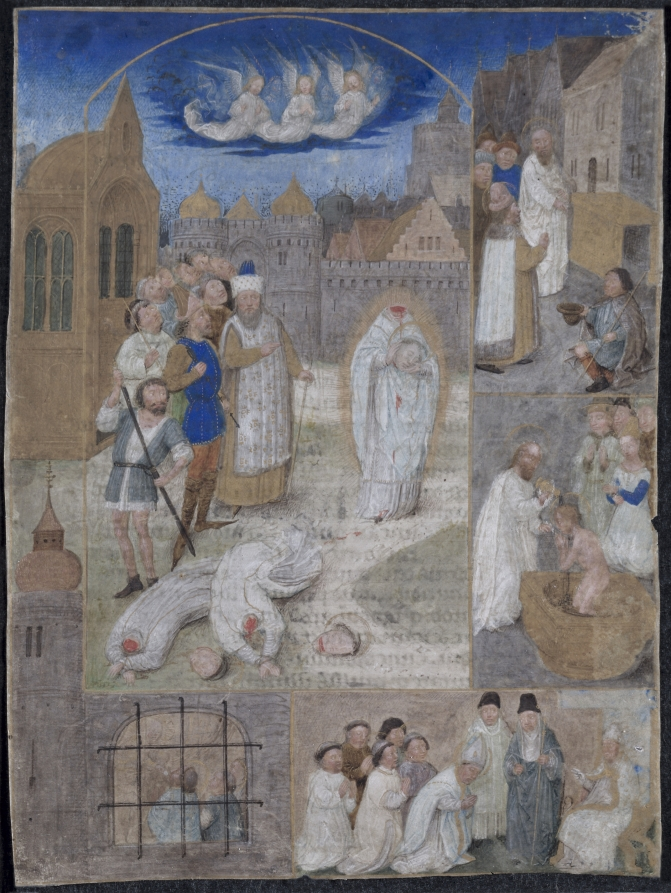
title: Leaf Excised from a Breviary of Charles the Bold and Margaret of York: The Martyrdom of Saint Denis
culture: France, Valenciennes, 15th century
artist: Simon Marmion (French, 1420s-1489)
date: c. 1467–70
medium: tempera on vellum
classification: Manuscript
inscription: Recto (none); verso (27 lines of written text in textura)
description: Simon Marmion was one of the most esteemed miniaturists of his generation. He was praised by the poet Jean Lemaire de Belges as the "prince of illumination." Marmion was a member of a family of painters from Amiens and likely trained in his father’s workshop before establishing his own workshop in Valenciennes. During the course of his career, he received numerous commissions from the Burgundian court, then resident in the Netherlands. In addition to manuscript illuminations, his commissions included paintings, altarpieces, portraits, and decorations for court festivities. This miniature comes from a deluxe breviary commissioned by the third duke of Burgundy, Philip the Good (r. 1419–67), but completed after his death for his son and successor, Charles the Bold (r. 1467–77), and his wife, Margaret of York. It survives with a sister leaf representing the Holy Virgins, now in the Metropolitan Museum of Art in New York. These two leaves are today the sole tangible remnants from a breviary that was well-documented in its time. It once contained 624 folios, 95 full-page miniatures, 12 calendar vignettes, and several thousand small initials and marginal decoration.